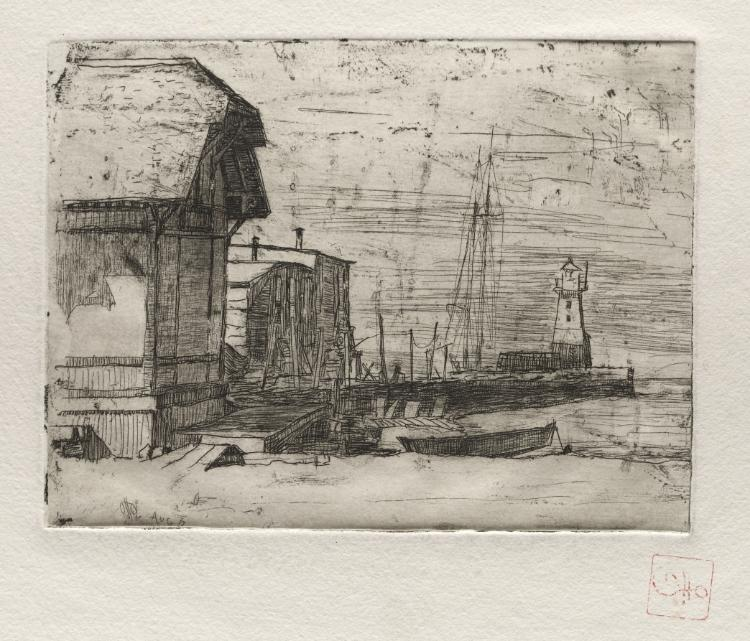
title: West Pier 1878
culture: America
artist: Otto H. Bacher (American, 1856–1909)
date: 1878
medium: etching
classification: Print